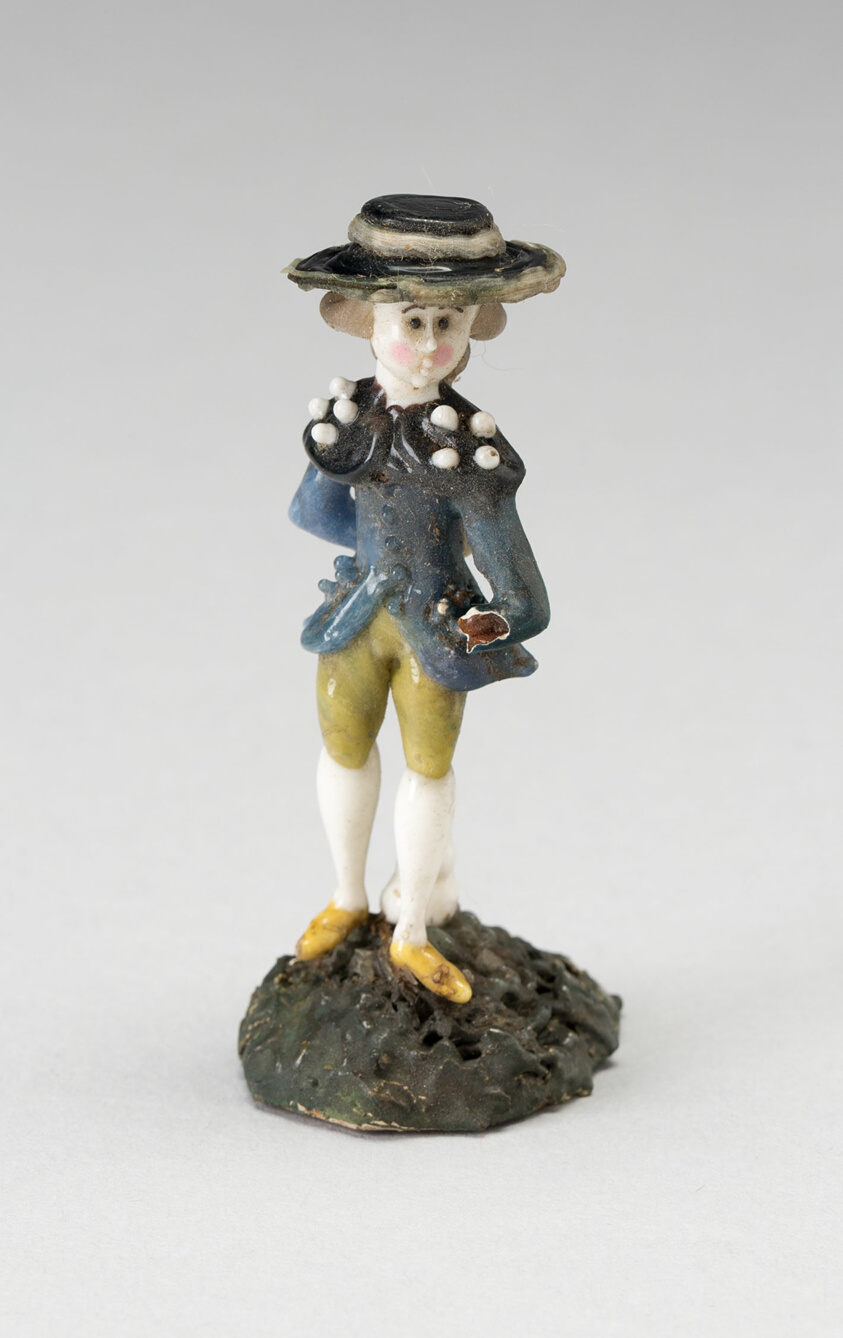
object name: Glass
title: Boy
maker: Nevers, France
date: 1750/99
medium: Glass; lampwork (verre de Nevers), metal armature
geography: France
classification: decorative object/ornament; lampwork; glass; european decorative arts